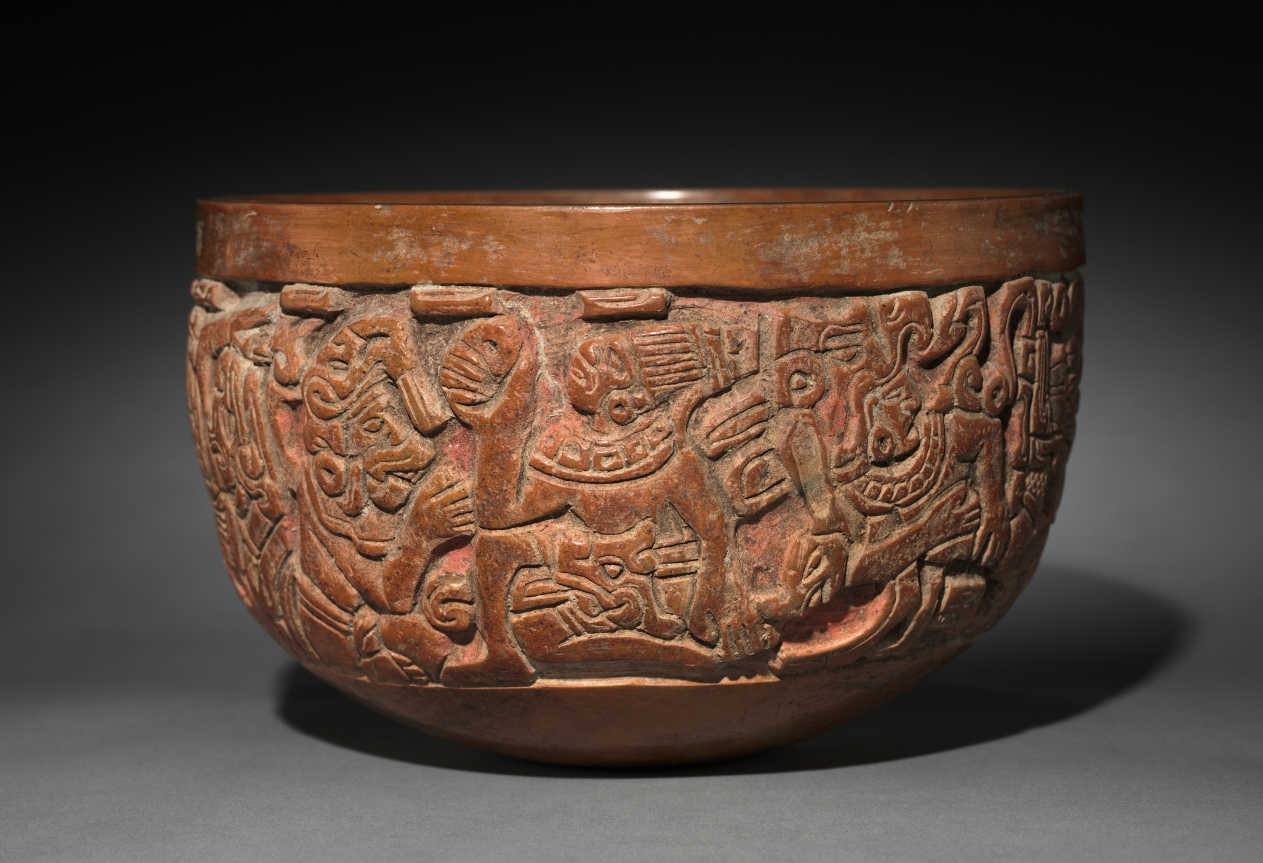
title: Bowl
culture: Mexico, South-central Veracruz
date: c. 500–1000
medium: molded, carved, and burnished pottery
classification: Sculpture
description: This mold-made ceramic bowl is decorated with a band of figures depicted in low relief. Most wear masks or grotesque headdresses, and four seem to struggle with deer. The meaning of the scene, which may be drawn from myth, is unknown.